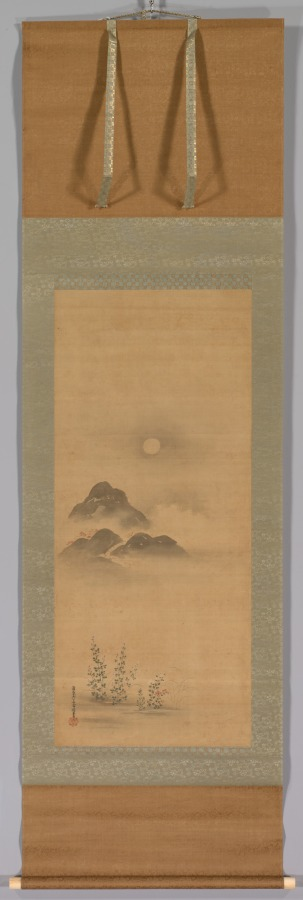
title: Minamoto no Nakakuni Visits Lady Kogō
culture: Japan, Edo period (1615–1868)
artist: Kiyohara Yukinobu (Japanese, 1643–1682)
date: late 1600s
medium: one of a triptych of hanging scrolls; ink and color on silk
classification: Painting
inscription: 款記「清原氏女雪信筆」/「清原女」朱文八角印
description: Kiyohara Yukinobu was one of Japan's earliest and most talented female painters. Kiyohara preferred Japanese-style painting techniques and subjects. Her work depicts the scenery and history of her native land. In addition to the tonalities of ink, she applied a delicate range of colors that help identify the seasons, an important theme in Japanese life and culture.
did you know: This nocturnal autumnal scene is the left part of a triptych presenting an episode from The Tale of the Heike.